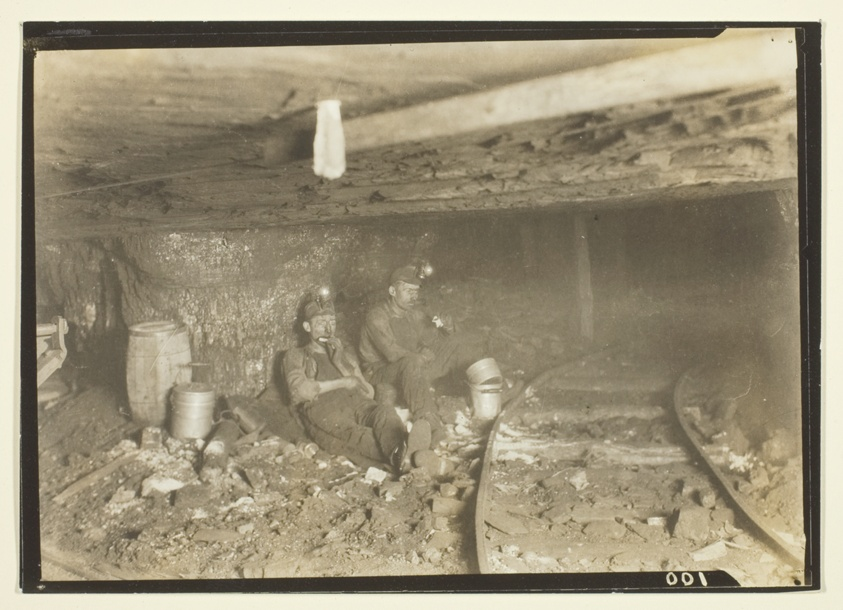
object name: Photograph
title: These Miners Like Their Lunch And A Little Rest In Such Low-Ceilinged Entries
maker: Lewis Wickes Hine (American, 1874–1940)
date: 1930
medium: Gelatin silver print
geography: United States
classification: gelatin silver (developing-out-paper) pr; photographic process; photography; photograph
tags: Collected by Hugh Edwards